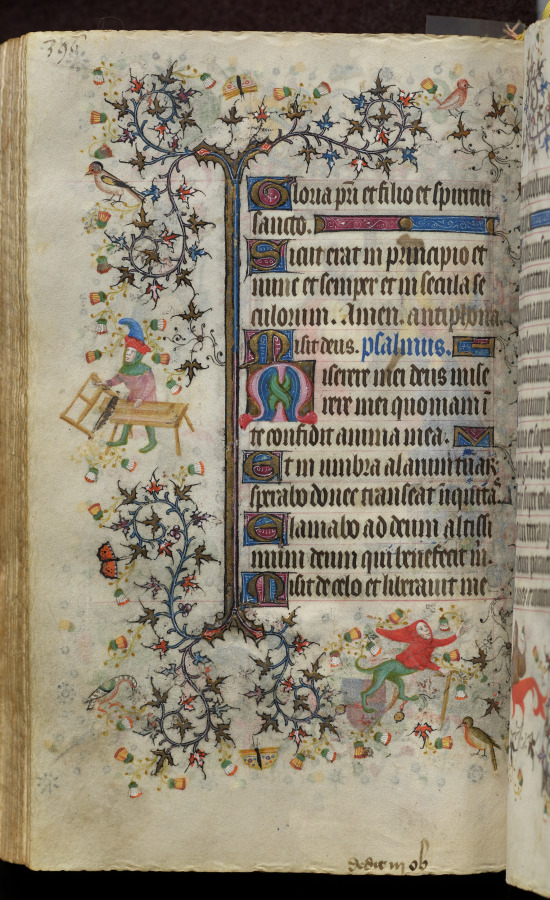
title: Hours of Charles the Noble, King of Navarre (1361-1425): fol. 192v, Text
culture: France, Paris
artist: Master of the Brussels Initials and Associates (French)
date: c. 1405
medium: ink, tempera, and gold on vellum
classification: Bound Volume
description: This precious volume was obviously highly prized by its owner, the French-born King of Navarre, who had his coat of arms painted on no less than twenty folios. Rather than directly commissioning this manuscript from a specific workshop, it seems that Charles the Noble acquired his book of hours -- perhaps ready-made for the luxury market -- while on a trip to Paris in 1404-05. A collaborative effort, six painting styles are evidenced within the pages of this codex, those of two Italians, two Frenchmen, and two Netherlanders. The painter who was responsible for the planning and decoration of the book, and who produced seventeen of the large miniatures, was a Bolognese artist known as the Master of the Brussels Initials. His principal assistant, responsible for most of the borders, was a Florentine who signed his name "Zecho" da Firenze on folio 208 verso.